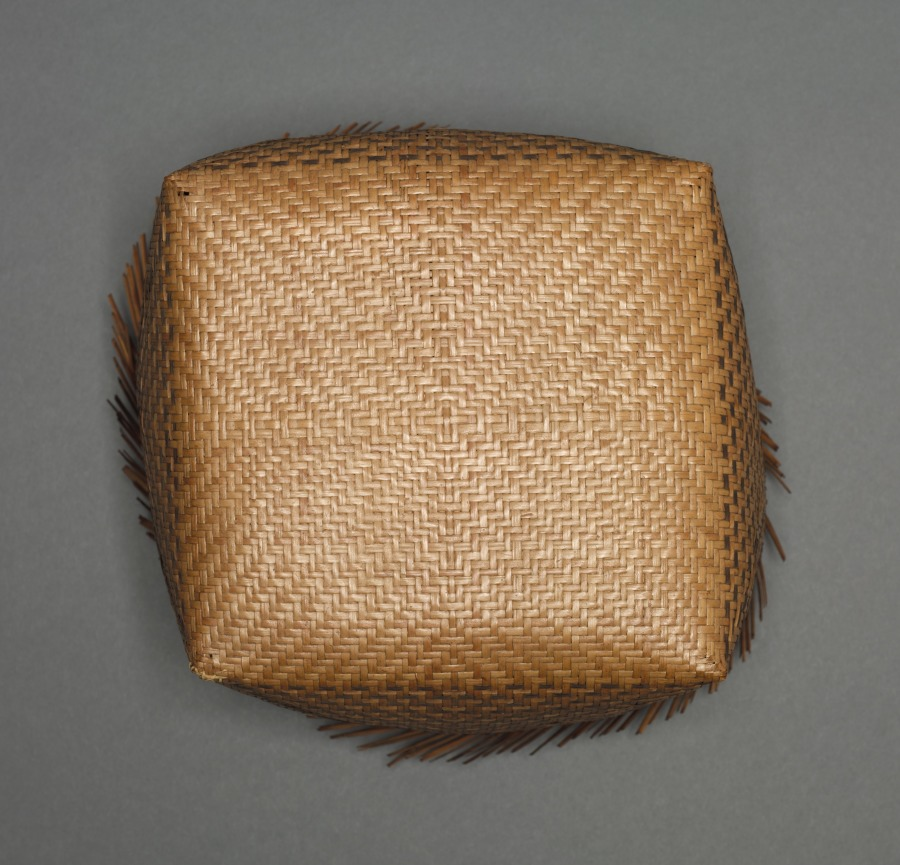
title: Hat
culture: Africa, Central Africa, Democratic Republic of the Congo, Mangbetu, 20th century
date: before 1929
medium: Plant fibers and dye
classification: Garment